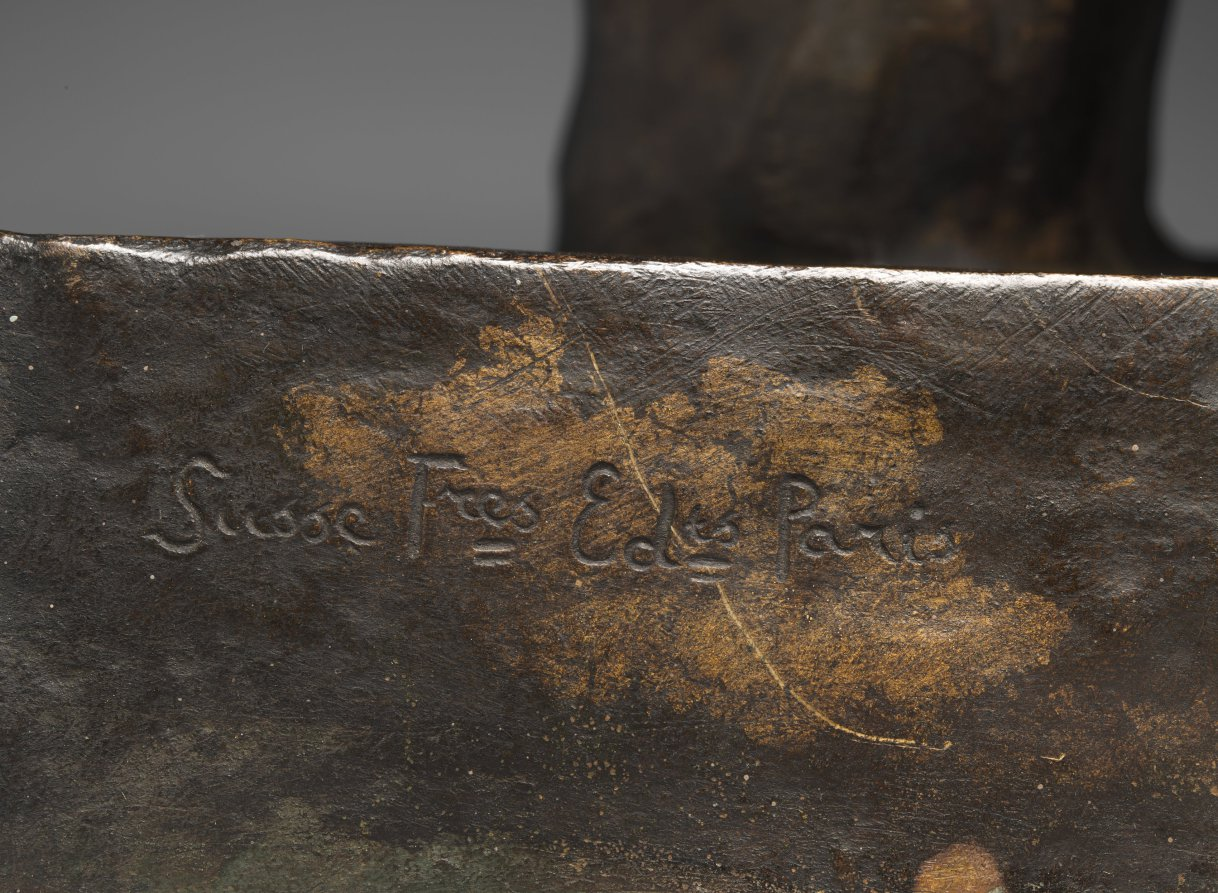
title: Torso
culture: France, 19th century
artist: Jules Dalou (French, 1838–1902)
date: c. 1850 – 1899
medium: bronze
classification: Sculpture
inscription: Signed: "J. Dalou"; "Susse Fres. Ed[ts] Paris"